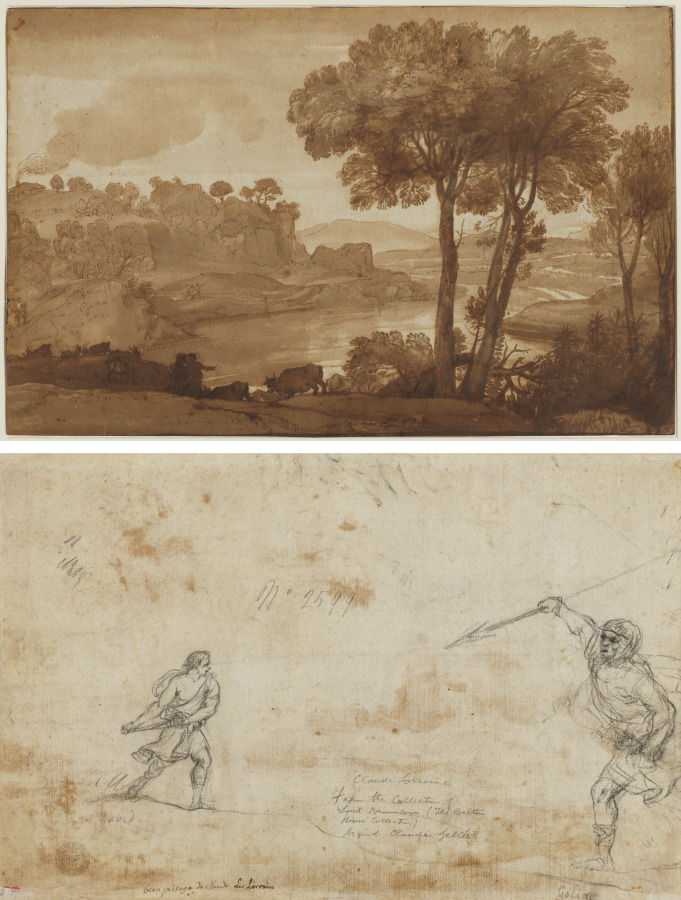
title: View of the Acqua Acetosa (recto); David and Goliath (verso)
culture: France, 17th century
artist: Claude Lorrain (French, 1604–1682)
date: c. 1645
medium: pen and brown ink and brush and brown wash over graphite, framing lines in brown ink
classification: Drawing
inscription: verso, lower left, in brown ink: beau peisage de claude Le Lorrain; lower left, in graphite: David; lower right, in graphite: Golia; upper center, in graphite: No 2599; lower center, in graphite: Claude Lorraine / From the Collection of / Lord Brownlow (The Belton / House Collection) / Signed Claudio Gellée.; lower left, in red watercolor: 55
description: This drawing represents a view of the famous Acqua Acetosa, a mineral spring that until the 19th century provided the favored drinking water of Romans who believed in its healing powers. Although topographically accurate, the sheet is not a plein-air study but a vision of an imagined Arcadian world carefully rendered by Gellée, one of the most original painters of the 17th century. The French-born artist spent his career painting and drawing the Roman Campagna and the Neopolitan coastline. Sublimely beautiful pen-and-ink and wash drawings such as the example here reveal the artist's highly poetic response to the natural world and his unparalleled sensitivity to light.